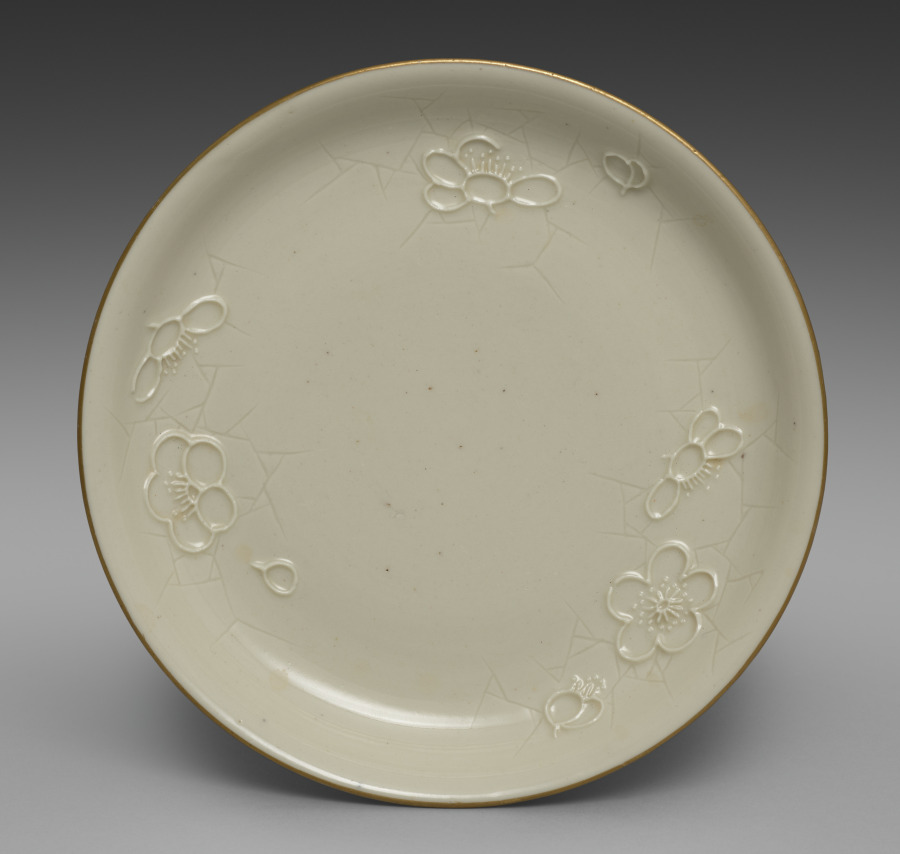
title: Medium-sized Dish from Dining Set with Plum Blossoms and Cracked-Ice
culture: Japan, Meiji period (1868–1912)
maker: Seifū Yohei II (Japanese, 1844–1878)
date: c. 1875–78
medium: Porcelain with molded designs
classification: Ceramic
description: Each item in this set has a delicate low-relief design of flowering plum branches over scattered, intersecting lines meant to resemble the cracked-ice surface of a frozen body of water and is signed on the base in gold pigment. While Yohei II produced many fine works in underglaze blue, like those produced by Kiyomizu Shichibei, he also made works in quite different styles later in his career, from the early 1870 s. In 1873, he was appointed purveyor to the Industrial Center of Kyoto Prefecture, a designation associated with Kyoto’s efforts to reach an international market through the port of Kobe; and from 1875 until his death, he was involved in national-level projects to present Japanese ceramics across the world. It was during this period that Yohei III was apprenticed to Yohei II, and it has been suggested that this set may in fact be an early example of Yohei III’s work, which he signed with his teacher’s name. Decorated with flowers resembling Japanese textile motifs, the set calls to mind the design of Yohei II’s pair of vases with plum blossoms in the Victoria and Albert Museum. Here, the elaborate trees created for a formal public exhibition setting have been translated into the approachable blossoms of the genteel domestic environment. While the designs are consistent across the pieces, each raised flower petal and pistil and each incised line in the ice was done by hand, so the cups, bowls, and dishes are similar yet unique. The bottoms of two boxes once identified the set’s owner, but the information has been deliberately obscured with black ink. However, inscriptions still visible appear to indicate two occasions, once at the end of July 1886 , and once again in June 1916 , when parts of the set were requested from Hokura in Niigata Prefecture. The location corresponds to a neighborhood in the present-day city of Jōetsu. The surname Tsuji 辻 also appears on a paper tag affixed to one of the box cloths. Future research may possibly reveal more about their provenance. A vase by Yohei III in a private collection combines the formal grandeur of the Yohei II vases in the Victoria and Albert Museum with the gentler design of this dining set, placing flowering plum trees against soft, scalloped-edge clouds resembling those in golden screens.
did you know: The dining wares have a creamy white coloration that the four boxes containing them identify as Korean in style.